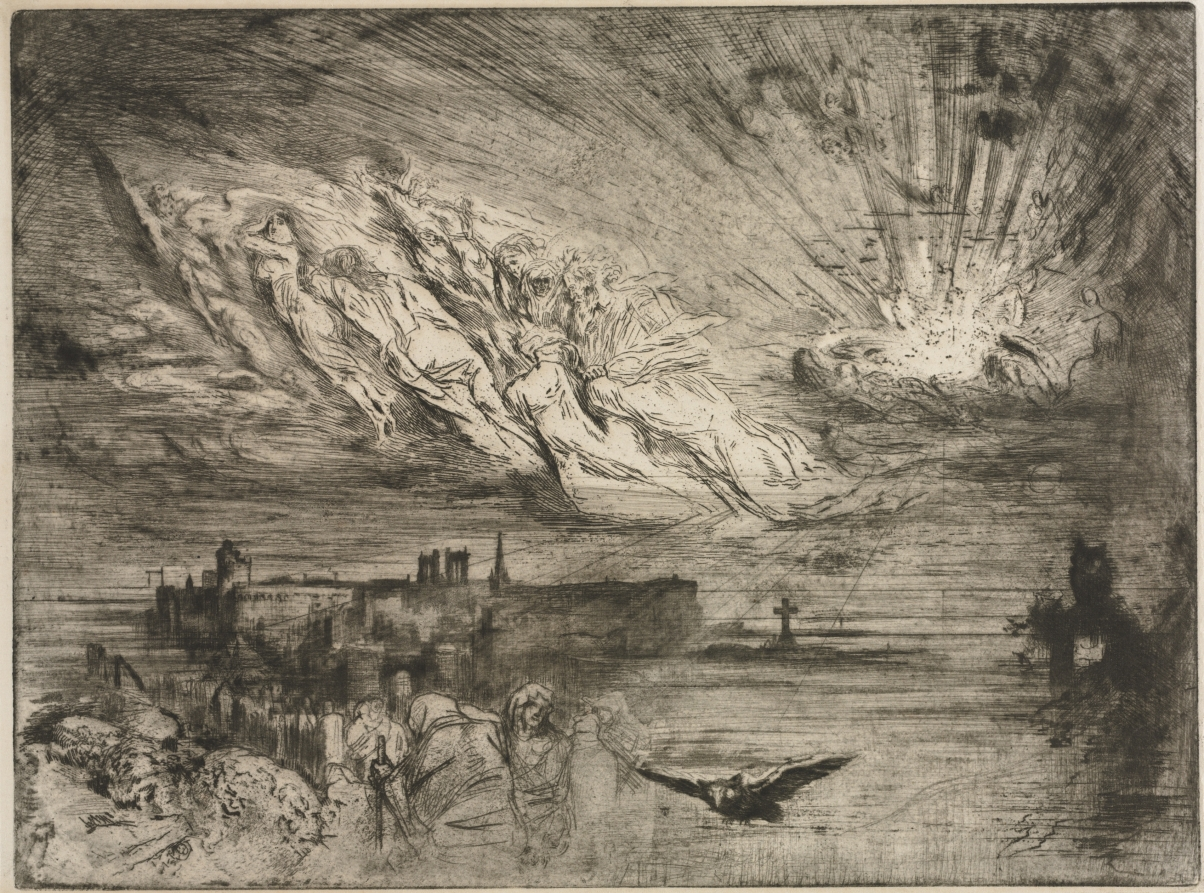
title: The Spirits from the Cities of the Dead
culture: France, 19th century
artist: Félix Hilaire Buhot (French, 1847–1898)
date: 1885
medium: etching, drypoint, aquatint and roulette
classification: Print